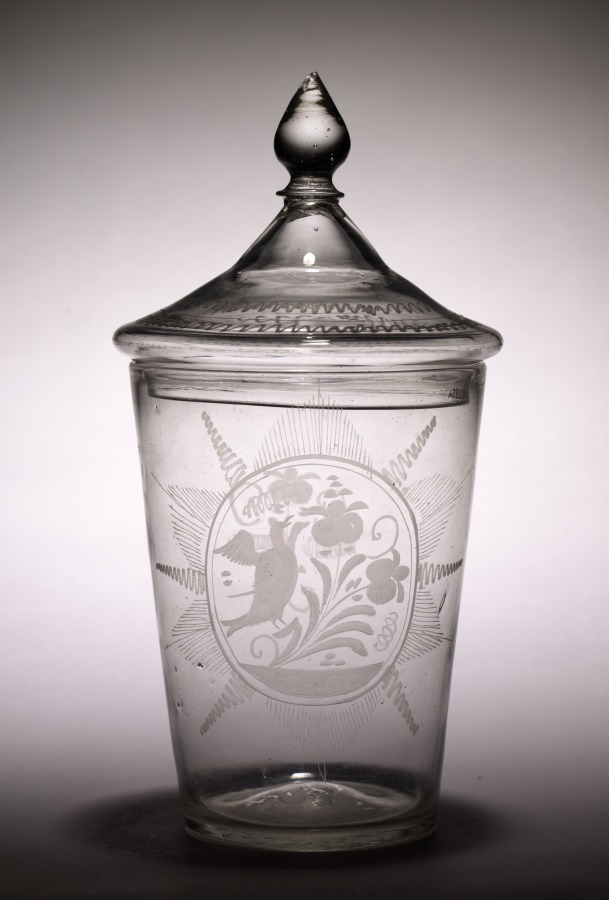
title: Flip Glass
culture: America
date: late 1700s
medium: glass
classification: Glass